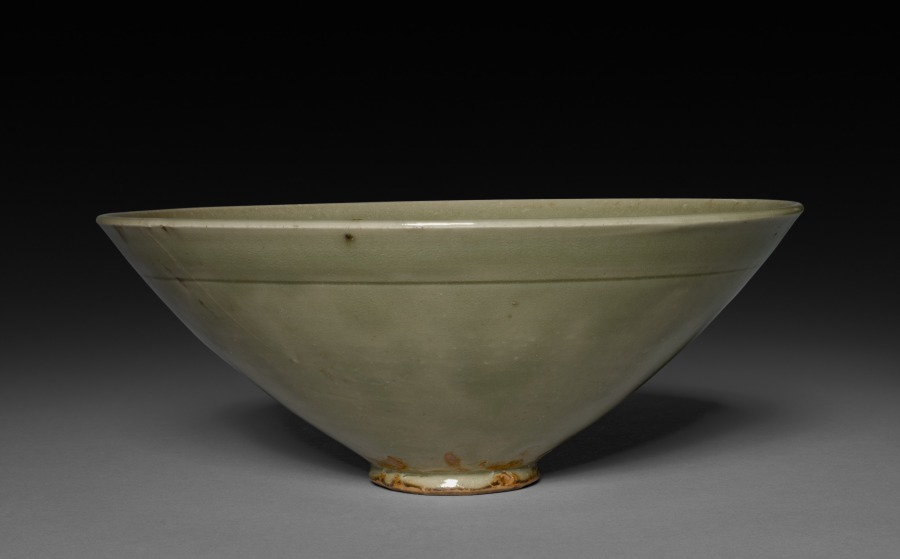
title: Bowl: Northern Celadon Ware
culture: China, Shaanxi or Henan province, Northern Song dynasty (960-1127)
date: 12th Century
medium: glazed stoneware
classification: Ceramic